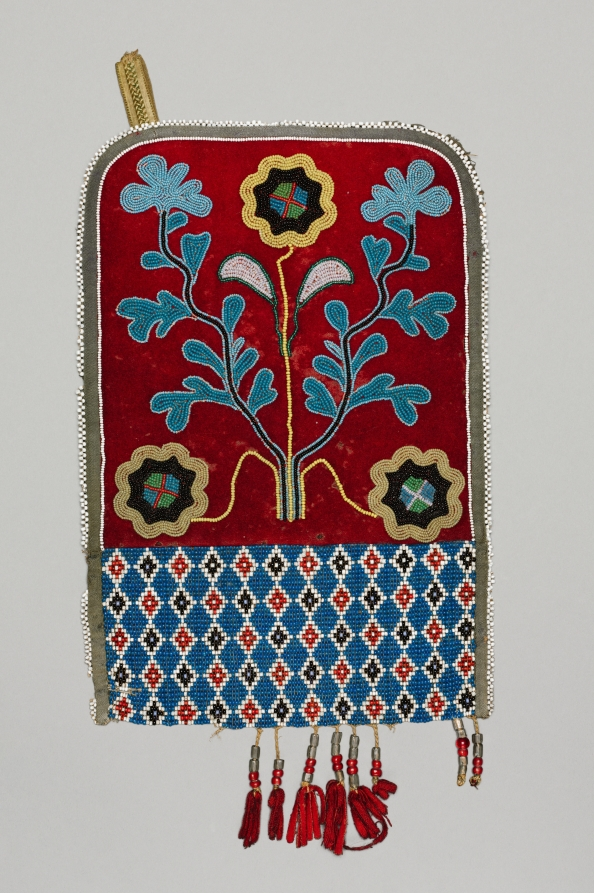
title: Bag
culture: Plains or Northeastern Woodlands, Nehiyawak (Cree) or Metis People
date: 1850–1900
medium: beadwork on cloth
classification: Textile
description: This colorful bag is beaded on both sides. On one side, the flowers resemble the sun, which native peoples of the Woodlands regard as the supreme spirit; the visual parallel is probably intentional. On the other side, a different plant symmetrically spreads its leaves and flowers across a dark, contrasting ground.